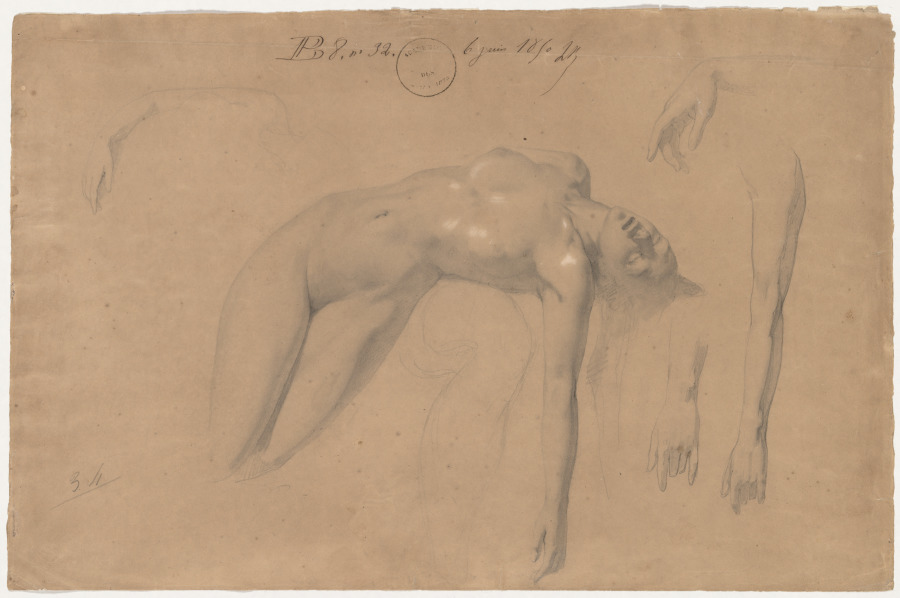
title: Reclining Female Nude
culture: France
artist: William-Adolphe Bouguereau (French, 1825–1905)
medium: Graphite, heightened with white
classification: Drawing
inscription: top center: B.8. no 32. 6 juin 1850